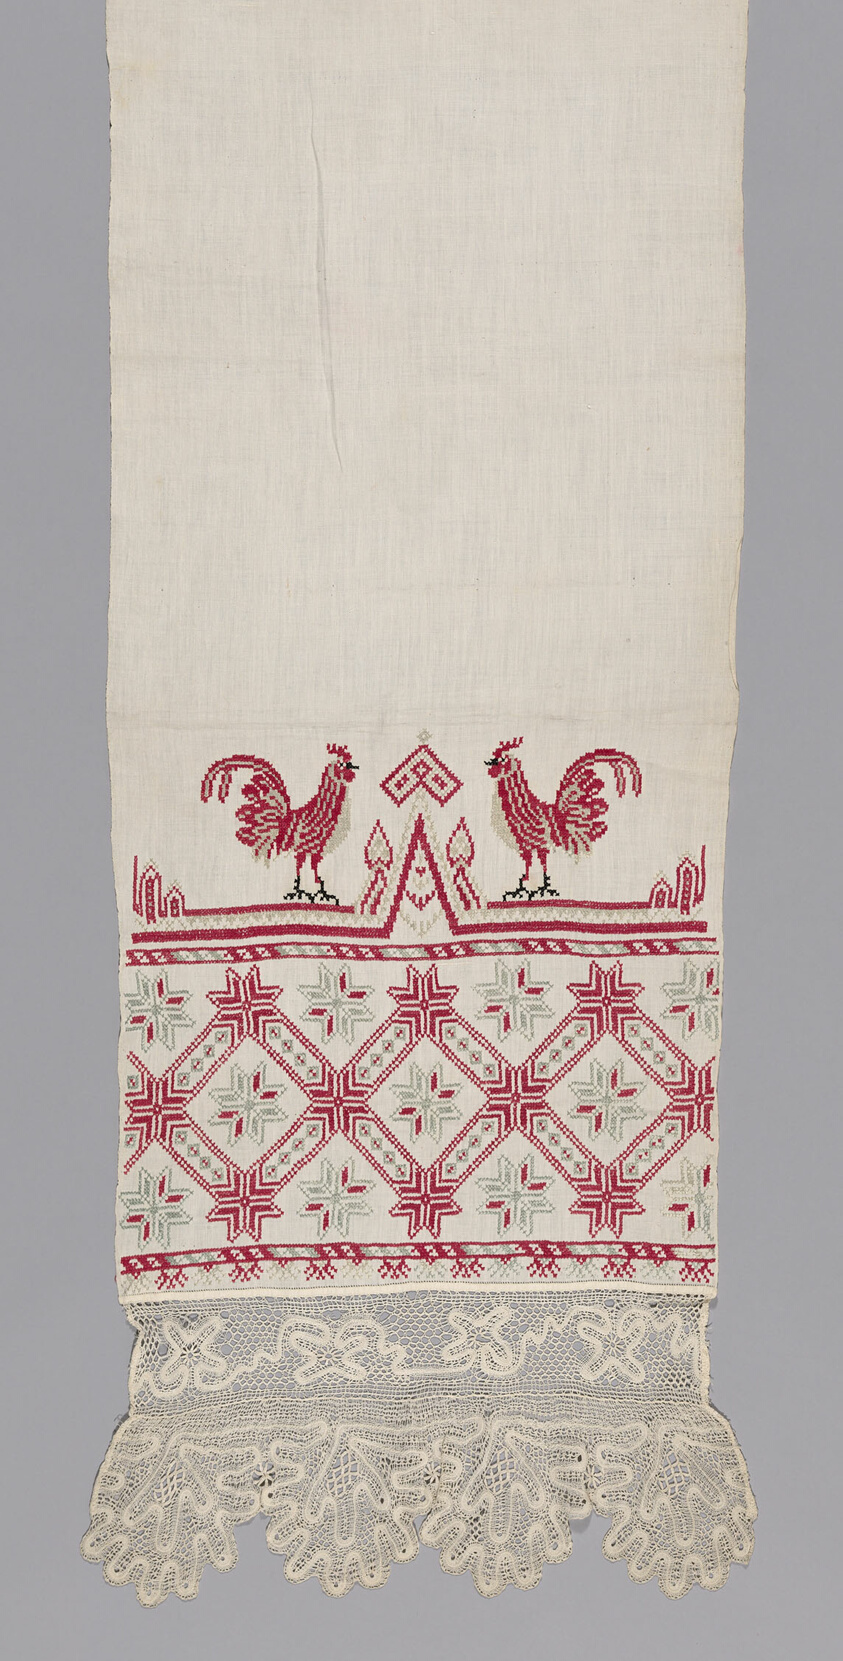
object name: Textile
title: Towel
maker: Russia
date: 19th century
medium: Linen, plain weave; embroidered in cross stitch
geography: Russia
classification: textile; needlework (visual works)